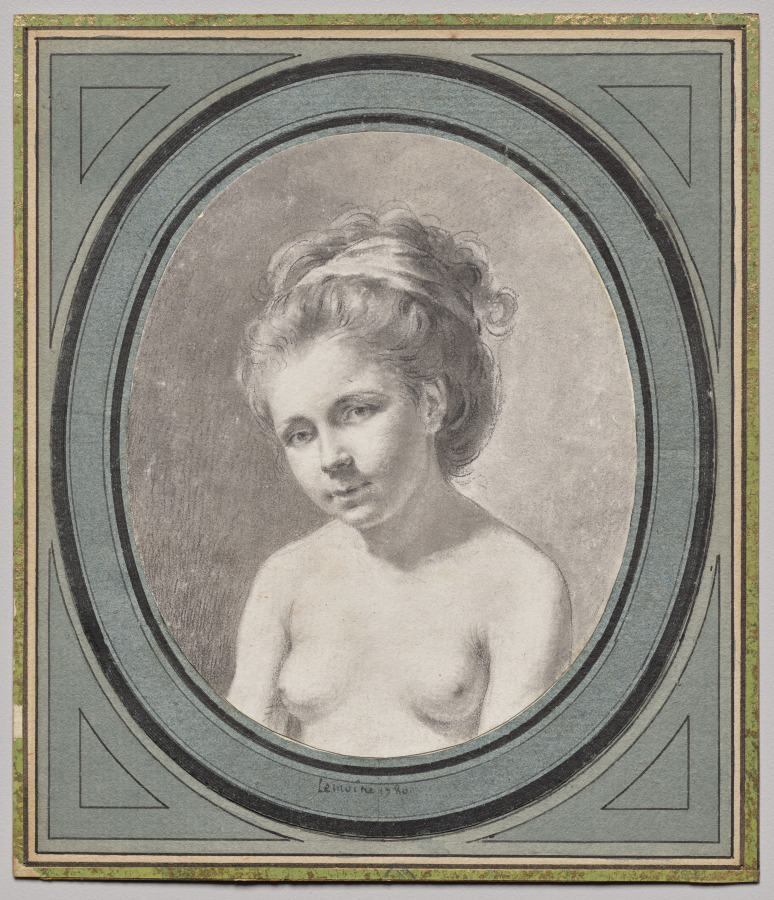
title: Bust of a Nude Woman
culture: France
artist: Jacques-Antoine-Marie Lemoine (French, 1751–1824)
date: 1780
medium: Black chalk and stumping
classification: Drawing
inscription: lower center, on original mount, in black ink: Lemoine 1780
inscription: verso of card: upper left, in graphite: EUEW / BWLG; upper center, in graphite: Jacques Antoine Marie LEMOINE / 1780; upper center, in graphite: Provenance: / V. Sardou (Auction 27/4/1909 no. 94) / Albert Lehman (Auction 8/6/1925 no. 161) / René Friburg (Auction 16/10/1963 no. 582); center, in graphite: Illustrated in the “Connoisseur” Dec 1969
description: Lemoine was famous for his black chalk portraits like this example of a bust of a nude girl. Given the sitter’s individualized features, this image could represent a specific portrait; however, her identity is now lost to modern viewers. Below the portrait on the blue oval mount, the artist signed and dated the work to indicate his authorship.